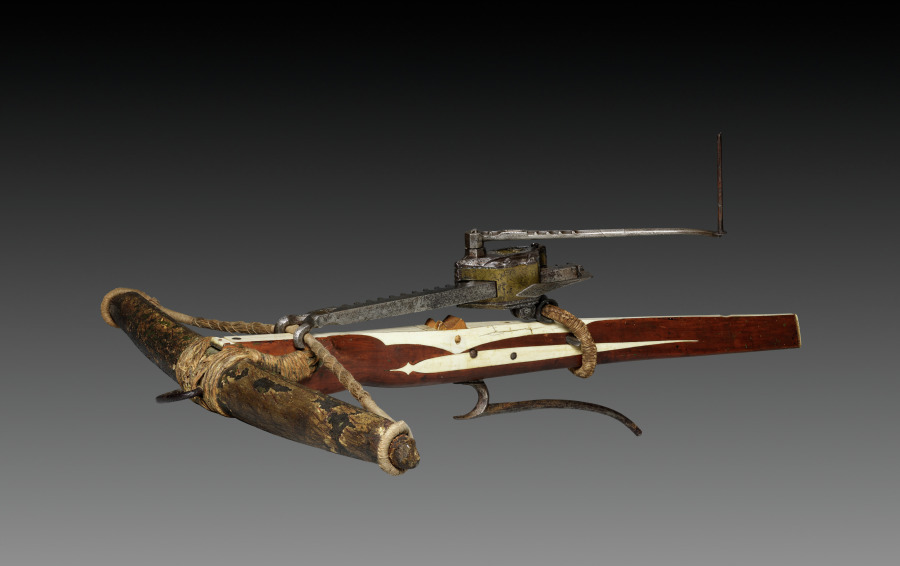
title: Crossbow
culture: Germany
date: c. 1460–70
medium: wood (walnut?) inlaid with bone; horn; iron and steel; composite bow (horn and parchment)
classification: Arms and Armor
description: The cranequin, or winding device sitting on top of the crossbow, made it easier to span for reloading. With a full quiver, a container for bolts and arrows, a hunter could bring home plenty of meat.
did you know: In every army in Europe crossbowmen were considered an elite corps, and as such occupied the central position in battle formations.